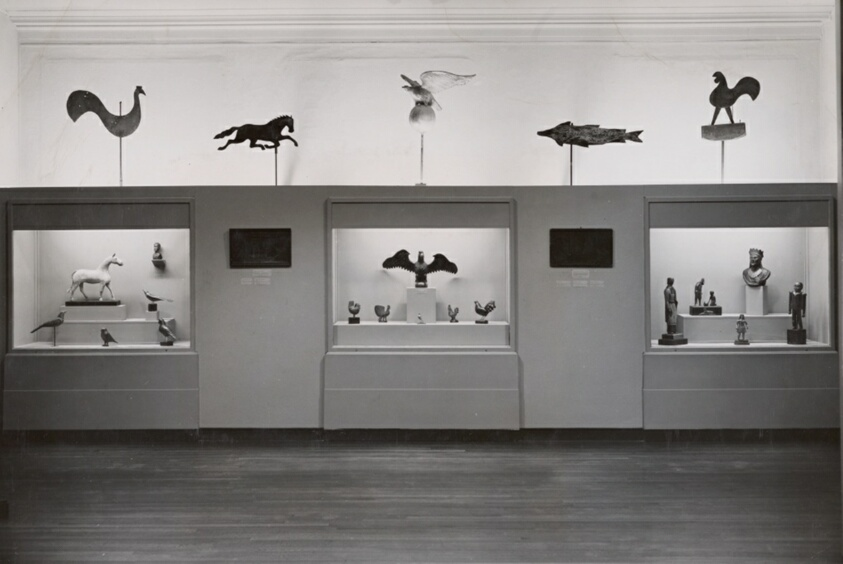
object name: Decorative Arts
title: Peacock Weather Vane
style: Folk Art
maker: Artist unknown (American, active 19th century); Pennsylvania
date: 1800–60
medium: Pennsylvania Iron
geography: Pennsylvania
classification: metalwork; american decorative arts; american arts; decorative arts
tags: animals, beasts